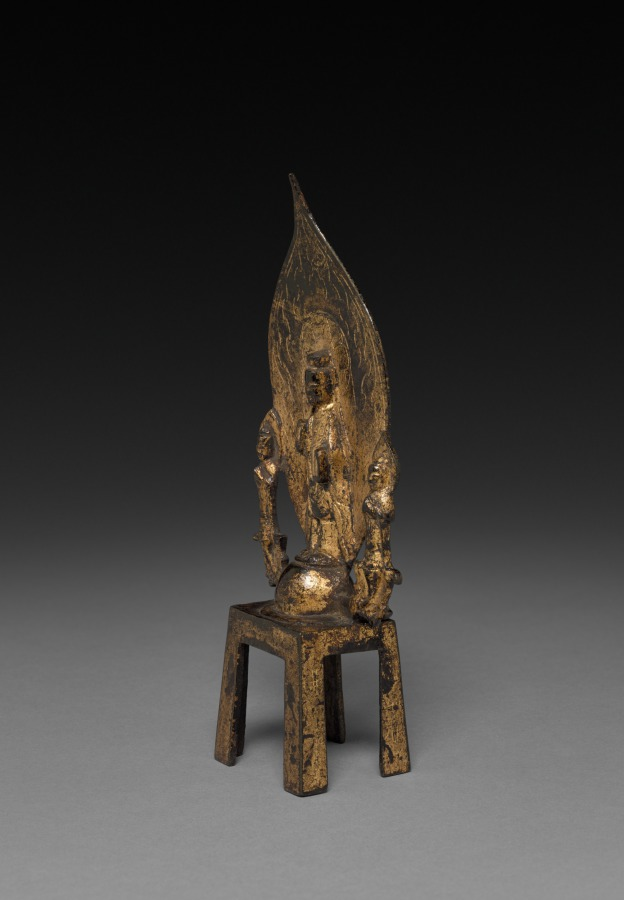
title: Sakyamuni with Two Attendants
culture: China, Sui dynasty (581-618)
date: 600s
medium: gilt bronze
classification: Metalwork